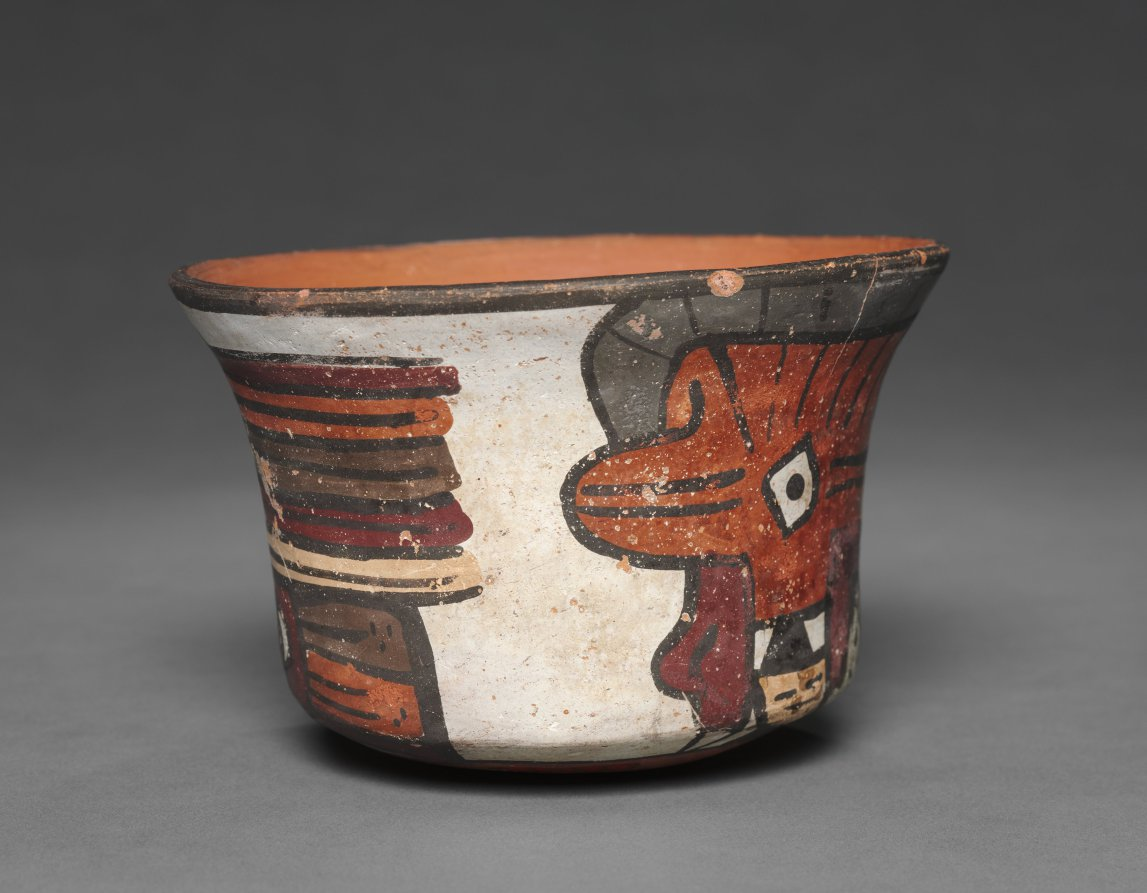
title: Bowl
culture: Peru, South Coast, Nasca, Florescent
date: 100 BCE–700 CE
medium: earthenware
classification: Ceramic